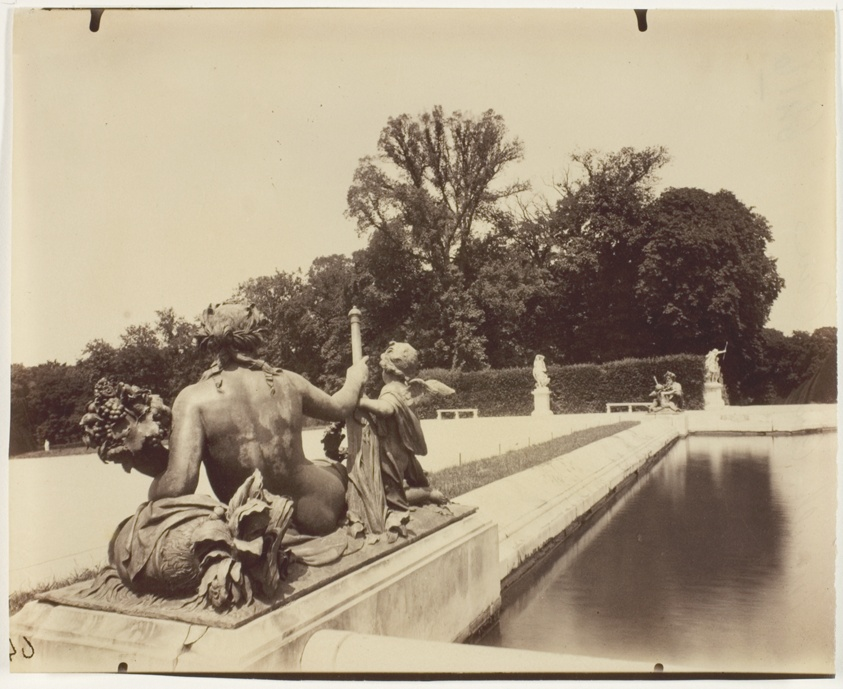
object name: Photograph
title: Versailles, Coin de Parc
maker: Jean-Eugène-Auguste Atget (French, 1857–1927)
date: 1903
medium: Albumen print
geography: France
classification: albumen silver print; photographic process; photography; photograph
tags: Collected by Hugh Edwards